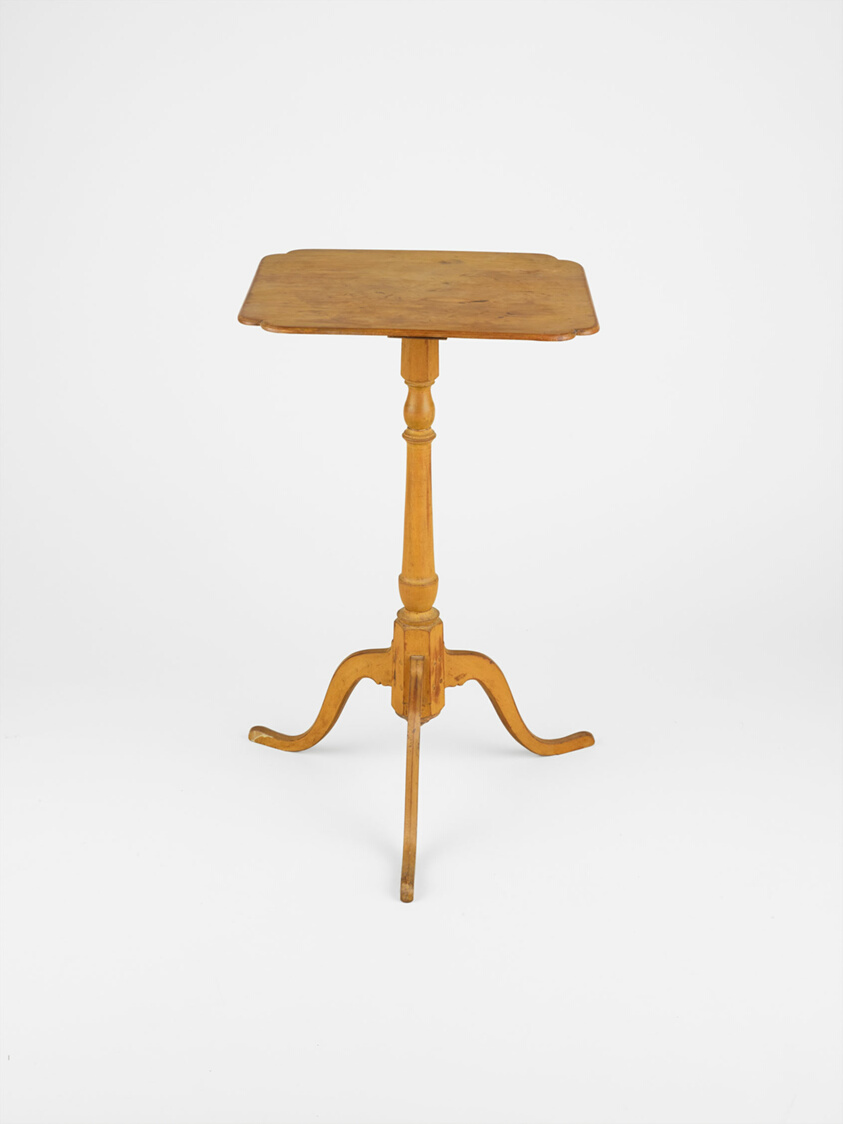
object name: Furniture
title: Stand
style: Folk Art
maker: Attributed to Samuel Dunlap (American, 1752–1830); Salisbury, New Hampshire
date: 1800–15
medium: Partially painted maple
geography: New Hampshire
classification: wood; stand; american decorative arts; american arts; furniture